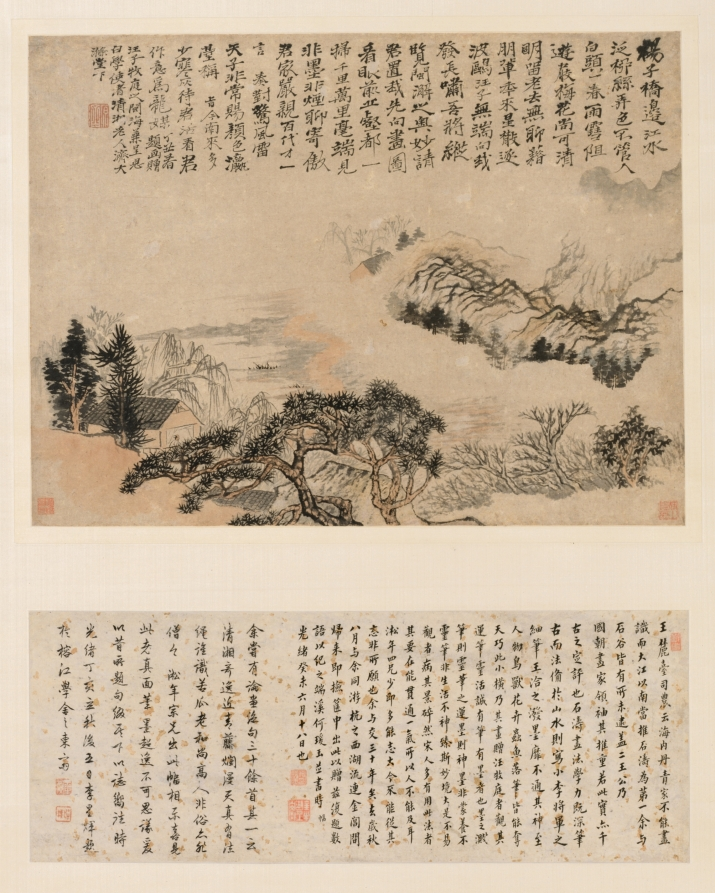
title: Spring Mist over Jiangnan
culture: China, Qing dynasty (1644-1911)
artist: Shitao (Chinese, 1642–1707)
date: 1697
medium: Hanging scroll; ink and light color on paper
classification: Painting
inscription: 揚子橋邊江水泛，柳絲弄色不管人白頭。/ 一春雨雪阻遊屐，梅花尚可清明留。/ 老去無聊藉朋輩，年來星散隨波鷗。/ 汪子無端向我發長嘯，吾將縱覧閩澥之奧妙。/ 請君置我先向畫圖看，眼前丘壑都一掃。/ 千里萬里毫端見，非墨非煙聊寄傲。/ 君家嚴親百代才，一言奏對驚風雷。/ 天子非常賜顏色，灜台稱旨今南來。/ 多少寒灰待君活，看君作意為龍媒。 丁丑春題畫，贈汪子牧庭之閩海。兼呈思白學使。清湘老人濟大滌堂下。[印]原濟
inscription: 2 colophons and 7 additional seals: 1 colophon and 4 seals of He Yuanyu 何瑗玉 (1840-?); 1 colophon and 2 seals of Li Xinhui (19th-20th c.); 1 seal unidentified.